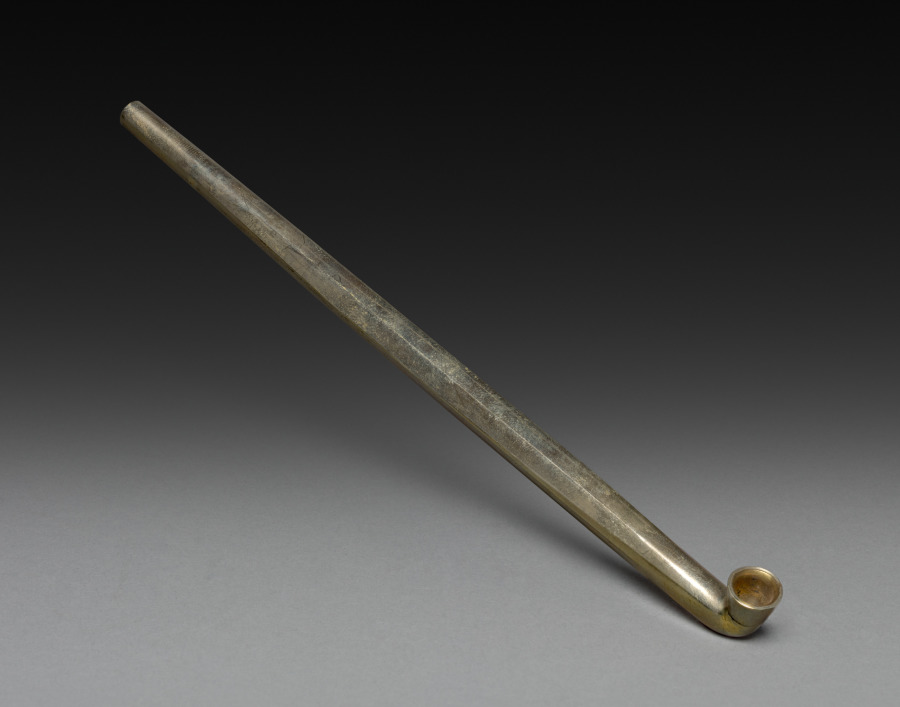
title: Tobacco Pipe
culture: Japan, Edo period (1615–1868)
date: early to mid-1800s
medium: metal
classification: Miscellaneous